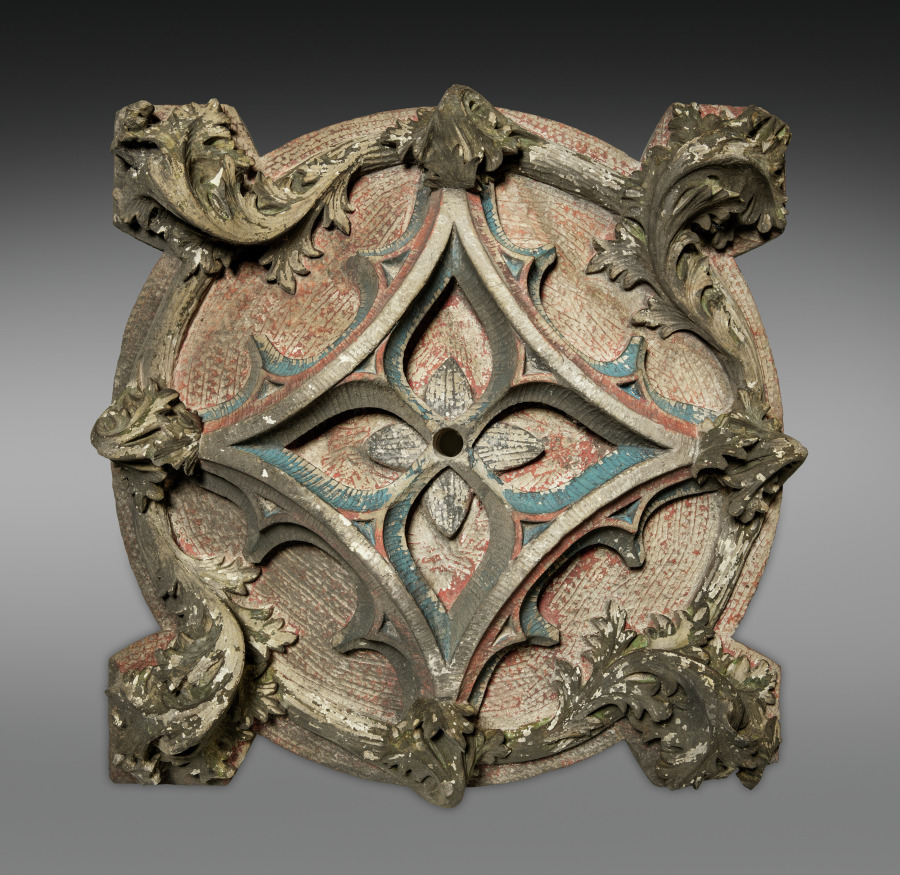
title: Roof Boss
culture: Northern Spain, 15th century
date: 1400s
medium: limestone with traces of polychromy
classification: Sculpture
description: In medieval architecture, a "boss" refers to an ornamentally carved, often painted and gilded, keystone. It was placed at the intersection of ribs in a vaulted roof in order to lock its members into position. Noteworthy examples are found in many of Europe's monastic cloisters and cathedrals. This example and the other shown nearby are reportedly from the vaulted ceiling of a monastery in Northern Spain. Their principal decorative motif consists of a spray of acanthus leaves.